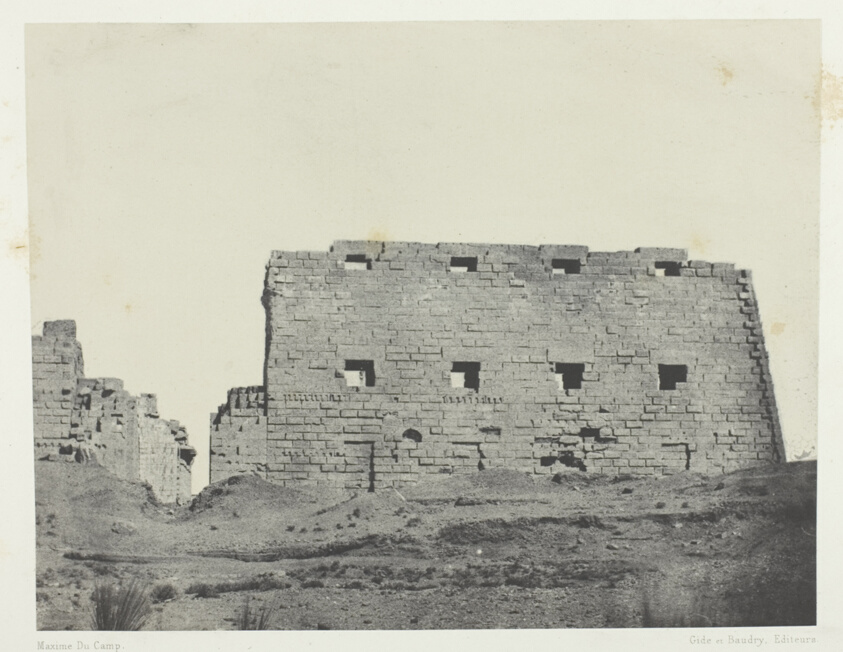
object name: Photograph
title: Palais de Karnak, Grands Pylones du Sud-Ouest; Thèbes, plate 36 from the album "Egypte, Nubie, Palestine et Syrie" (1852)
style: 19th century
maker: Maxime Du Camp (French, 1822–1894)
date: 1849/51, printed 1852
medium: Salted paper print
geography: France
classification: salted paper print; photographic process; photography; photograph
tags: Collected by Hugh Edwards, Egypte, Nubie, Palestine et Syrie